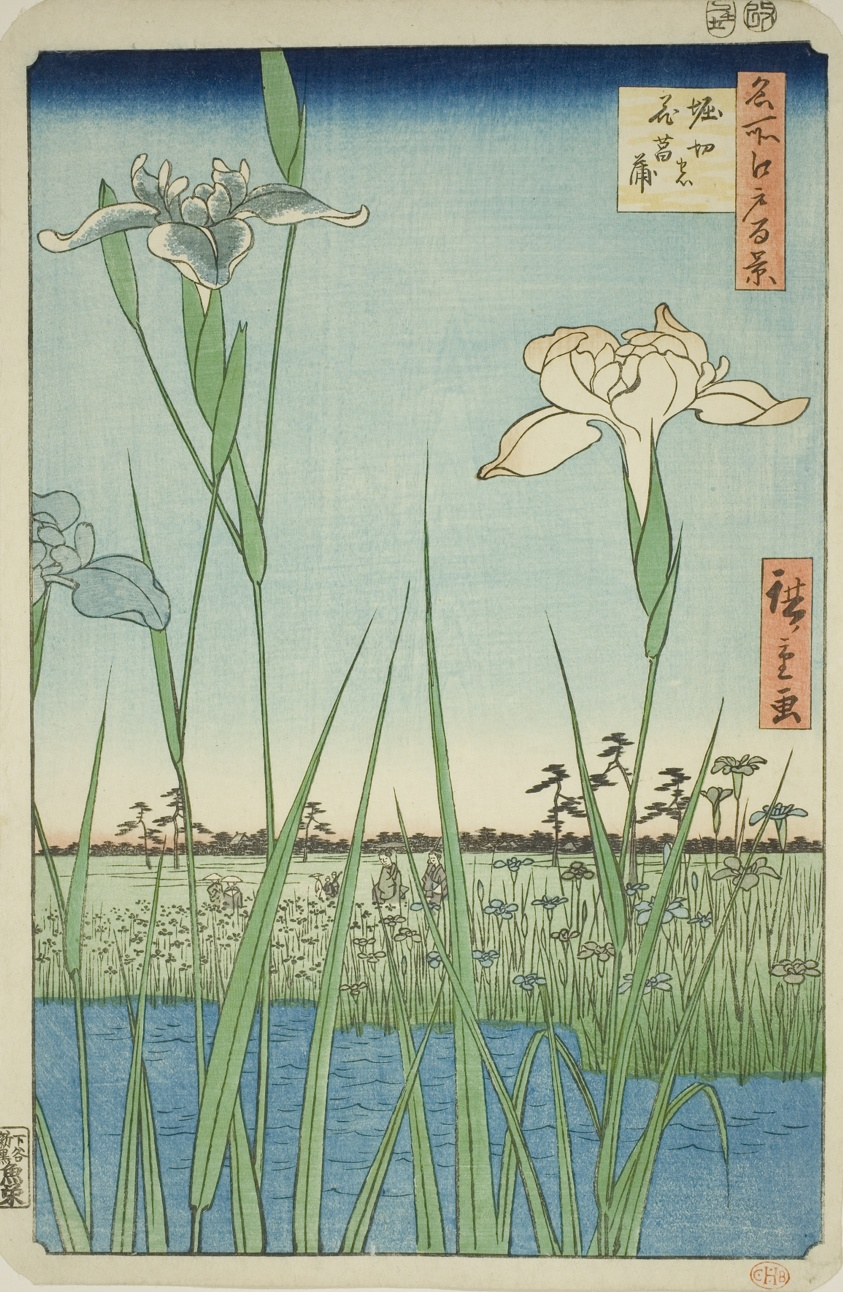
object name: Print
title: Irises at Horikiri (Horikiri no hanashobu), from the series "One Hundred Famous Views of Edo (Meisho Edo hyakkei)"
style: Japanese (culture or style)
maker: Utagawa Hiroshige 歌川 広重; Japanese, 1797-1858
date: 1857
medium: Color woodblock print; oban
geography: Japan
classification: woodblock print; print; asian art